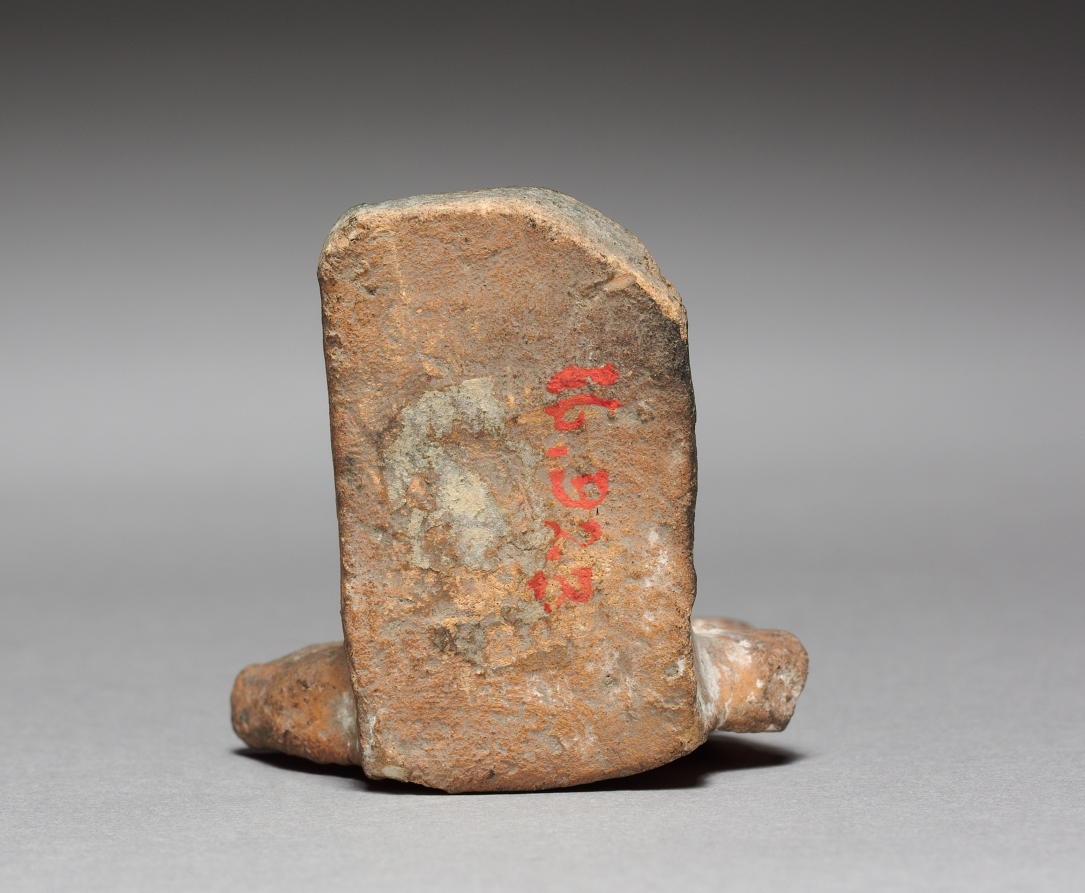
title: Figurine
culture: Mexico, Aztec, 14th century-16th century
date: 1325–1521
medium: terracotta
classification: Ceramic